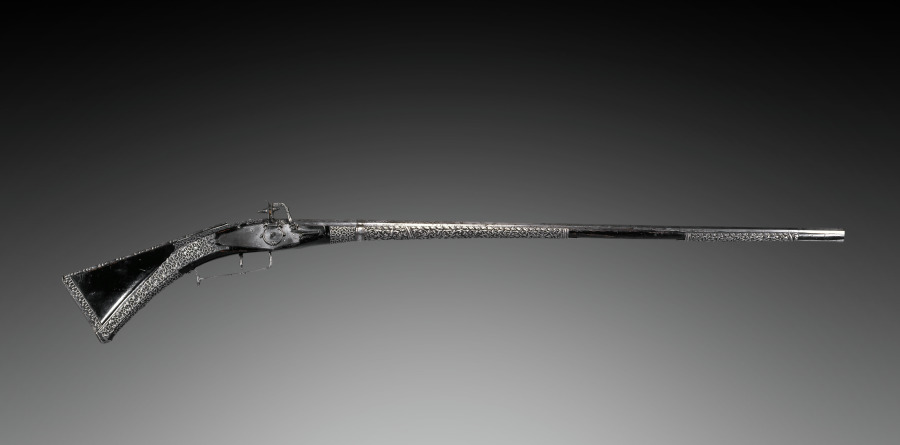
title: Wheel-Lock Hunting Rifle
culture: Italy, Sardinia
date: c. 1650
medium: steel; pierced and chiseled mounts, walnut stock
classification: Arms and Armor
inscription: Inscribed: (on Barrel): A PATIS AND PEVRVV ET FILS [partially indecipherable]